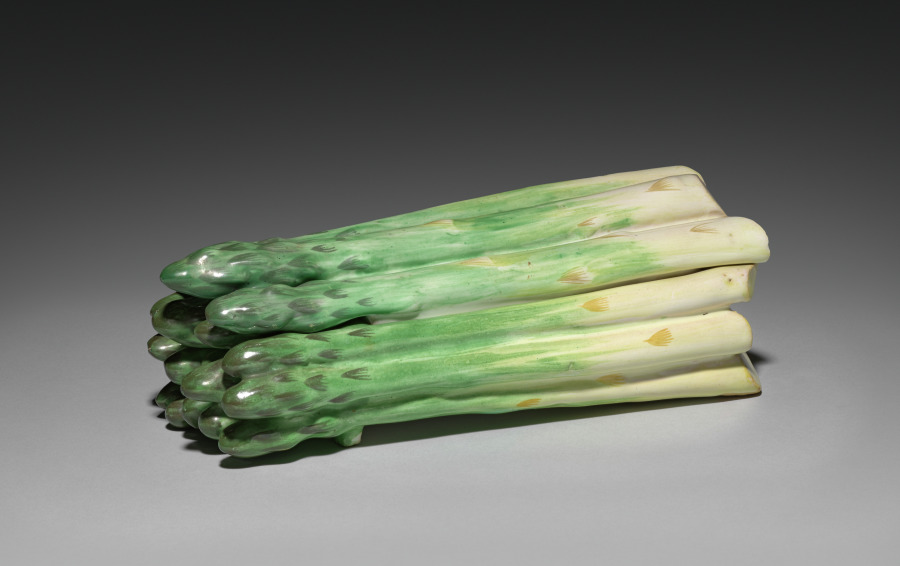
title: Box in the Form of Asparagus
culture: France, Sceaux(?), 18th century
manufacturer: probably by Sceaux Factory (French, active 1748–66)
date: c. 1765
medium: tin-glazed earthenware (faience) with enamel decoration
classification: Ceramic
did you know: Placed upon the dinner table, this container's lid might be lifted to reveal steaming asparagus. Imagine a wealthy 18th-century dining room with flickering candles, whimsical sculptures, and dishes like this decorating the table.